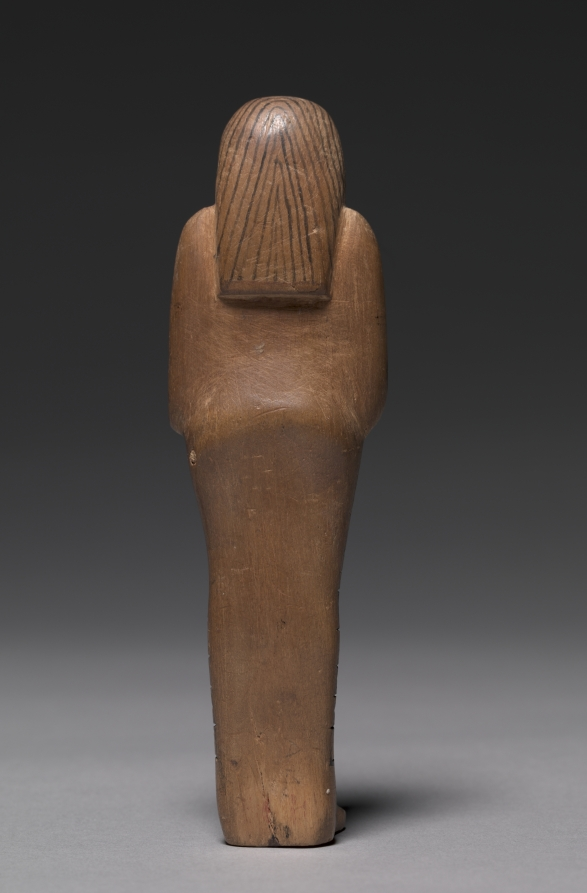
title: Shawabty of Tashery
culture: Egypt, New Kingdom (1540–1069 BCE), Dynasty 18, reign of Amenhotep III (1390–1352 BCE)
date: c. 1391–1353 BCE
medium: painted tamarisk?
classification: Funerary Equipment